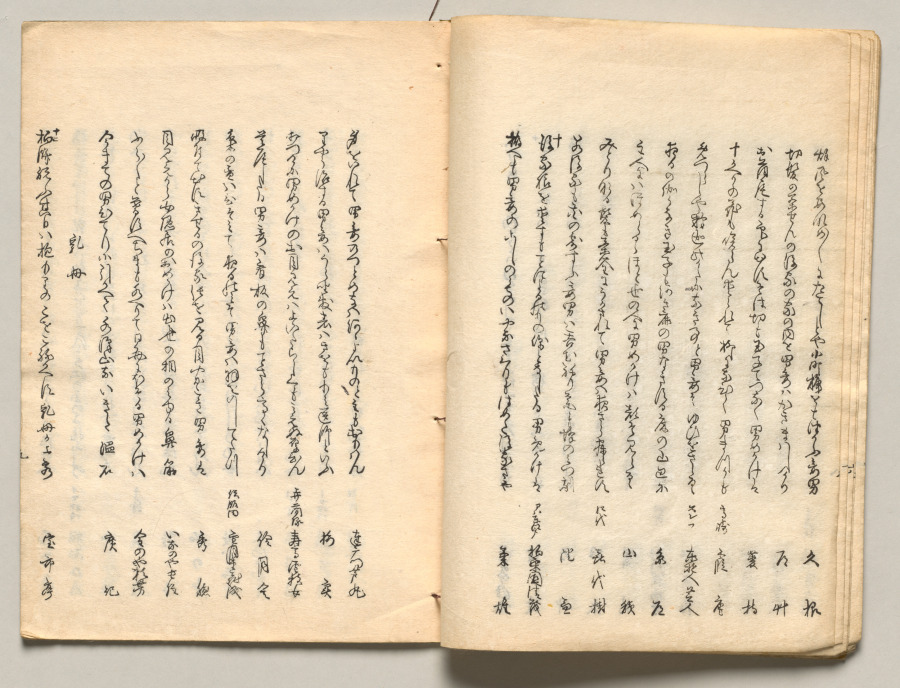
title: Spread Seventeen from Volume Four of People of Japan in Light Verse (Kyōka)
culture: Japan, Edo period (1615–1868)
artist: Utagawa Hiroshige (Japanese, 1797–1858)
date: 1857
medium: Woodblock-printed book; ink and color on paper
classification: Bound Volume